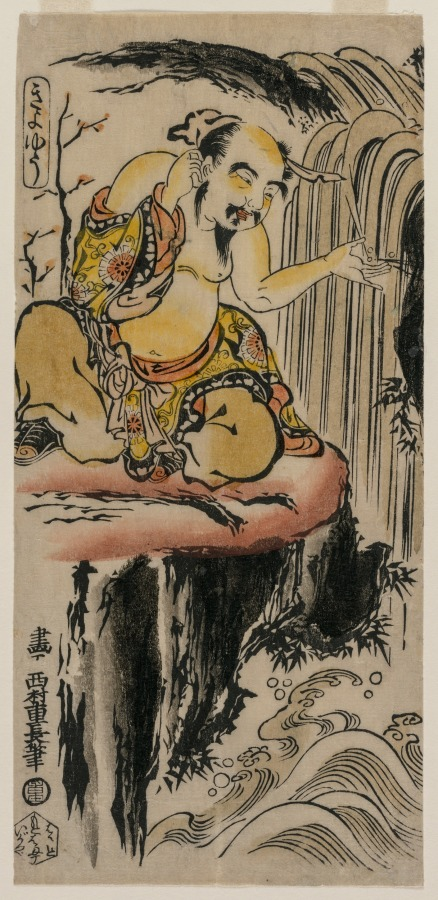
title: Xu You Rinsing his Ear at a Waterfall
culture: Japan, Edo period (1615–1868)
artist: Nishimura Shigenaga (Japanese, 1697(?)-1756)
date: mid-1720s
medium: color woodblock print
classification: Print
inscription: Signature: Gako Nishimura Shigenaga hitsu Publisher: Igaya Sanemon (Hammoto Igaya, Motohamacho)